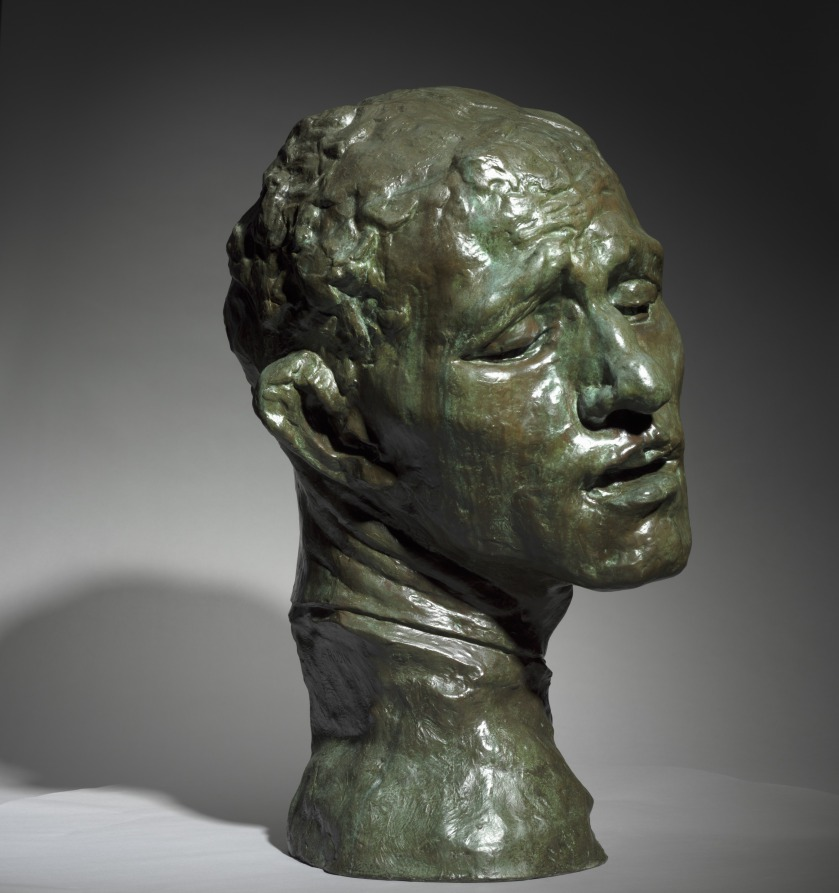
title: Heroic Head of Pierre de Wissant, One of the Burghers of Calais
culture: France, 19th century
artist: Auguste Rodin (French, 1840–1917)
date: 1886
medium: bronze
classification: Sculpture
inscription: inscribed at neck, left: A.Rodin; inscribed lower back: Alexis Rudier/Fondeur-Paris.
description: This sculpture depicts one of the figures in Rodin’s large public monument The Burghers of Calais (1884–89), featuring six French men who volunteered to be taken prisoner by the English in exchange for lifting the siege of Calais during the Hundred Years War (1337–1453). Pierre de Wissant’s anguished expression suggests extreme mental suffering as he contemplates his expected execution. Rodin exhibited a life-size version of the figure as an independent work before completing the monument. He later made multiple versions in various sizes and media.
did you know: This sculpture depicts the head of a figure from Rodin's large public monument The Burghers of Calais (1884-89). The CMA also owns a plaster version of the head.